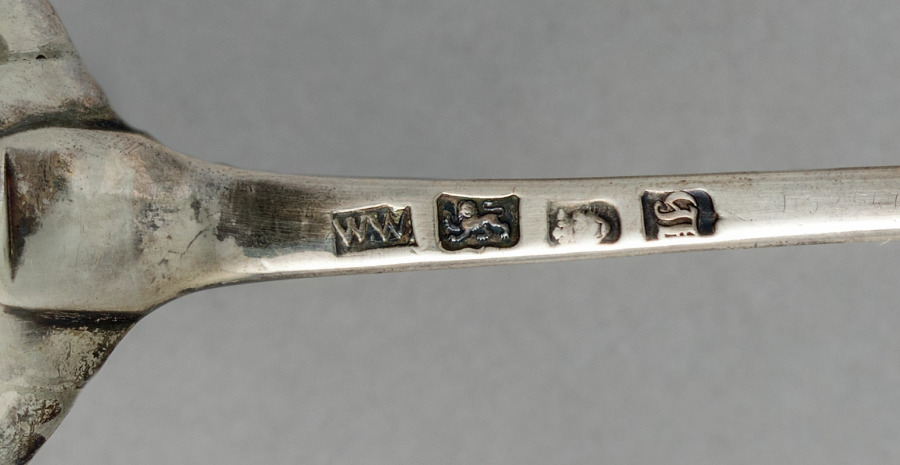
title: Serving Spoon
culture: England, London, 19th century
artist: assisted by William Wooler (British)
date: 1763–1764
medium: silver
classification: Silver